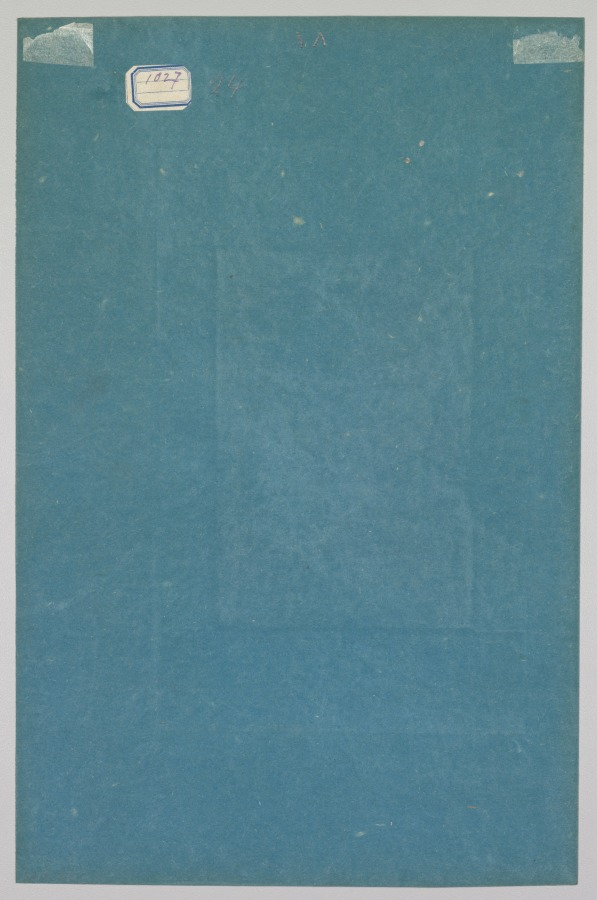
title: A female figure standing in a landscape holding a four-stringed “khuuchir” and a lotus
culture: Mughal India, court of Akbar (reigned 1556–1605)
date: c. 1590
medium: Gum tempera and gold on paper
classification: Painting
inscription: [verso, upper left, sticker] 1027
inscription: [verso, right of sticker, in pencil] 24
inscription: [verso, upper center, in pencil, upside down] VI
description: Standing over flowering sprigs, holding a lotus like a scepter, the figure seems to magically impart fertility to a desert. In pan-Indian religious iconography (system of visual symbols that identify a figure), the lotus is held by the goddess of good fortune, prosperity, and abundance, who is frequently associated with ideal kingship. The stringed instrument recalls the Indian goddess of learning and music, but here it is of a Mongolian type, as is the feather in her crown. Her garments are reminiscent of those worn by biblical and classical figures in European engravings. This painting combines Indian, European, and Mongolian references.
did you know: The four strings of the woman’s khuuchir would have been made from silk.